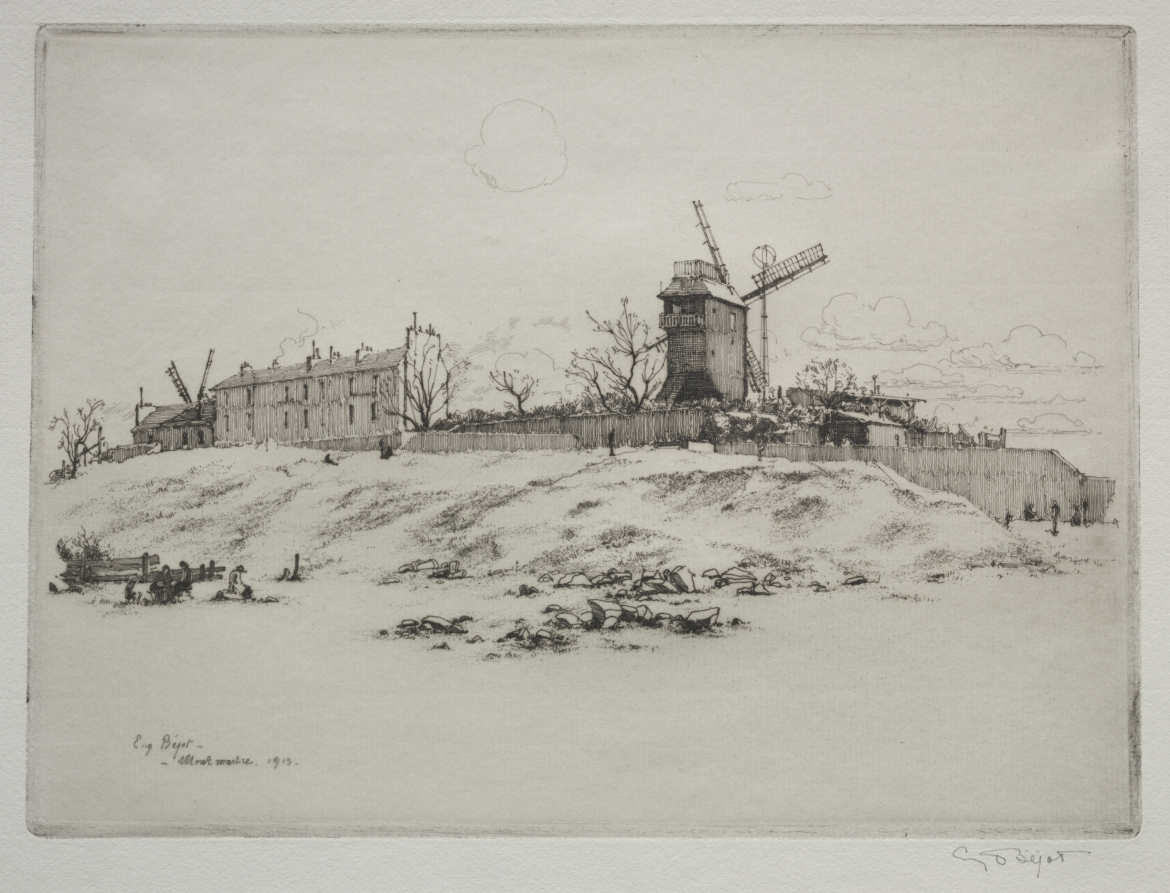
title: Moulin de la Gallette, Montmartre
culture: France, 20th century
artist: Eugène Bejot (French, 1867–1931)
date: 1915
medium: etching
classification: Print